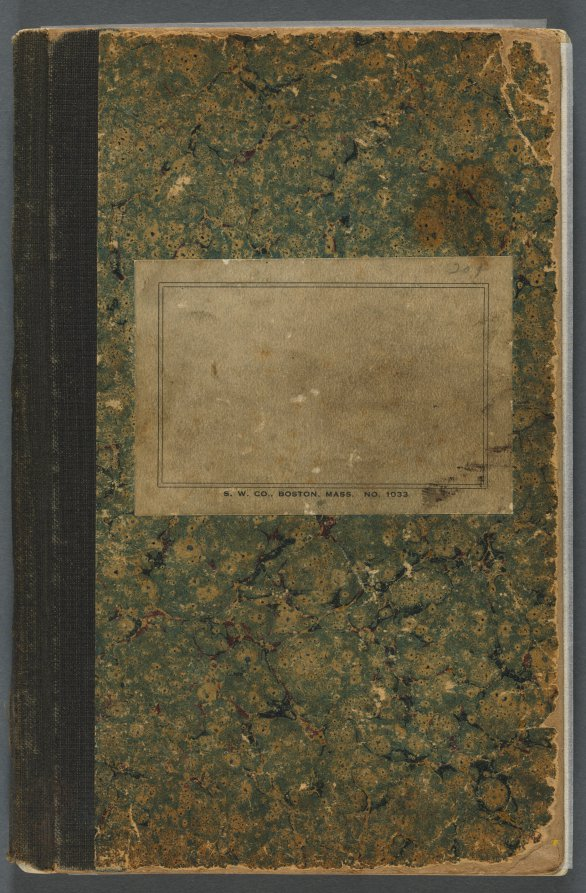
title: Sketchbook, The Dells, N° 127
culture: America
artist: Maurice Prendergast (American, born Newfoundland [now Canada], 1858–1924)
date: c. 1919–1921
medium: graphite and watercolor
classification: Bound Volume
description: This sketchbook contains 59 pages of graphite drawings and 16 watercolors made at various locations on Cape Ann, Massachusetts.